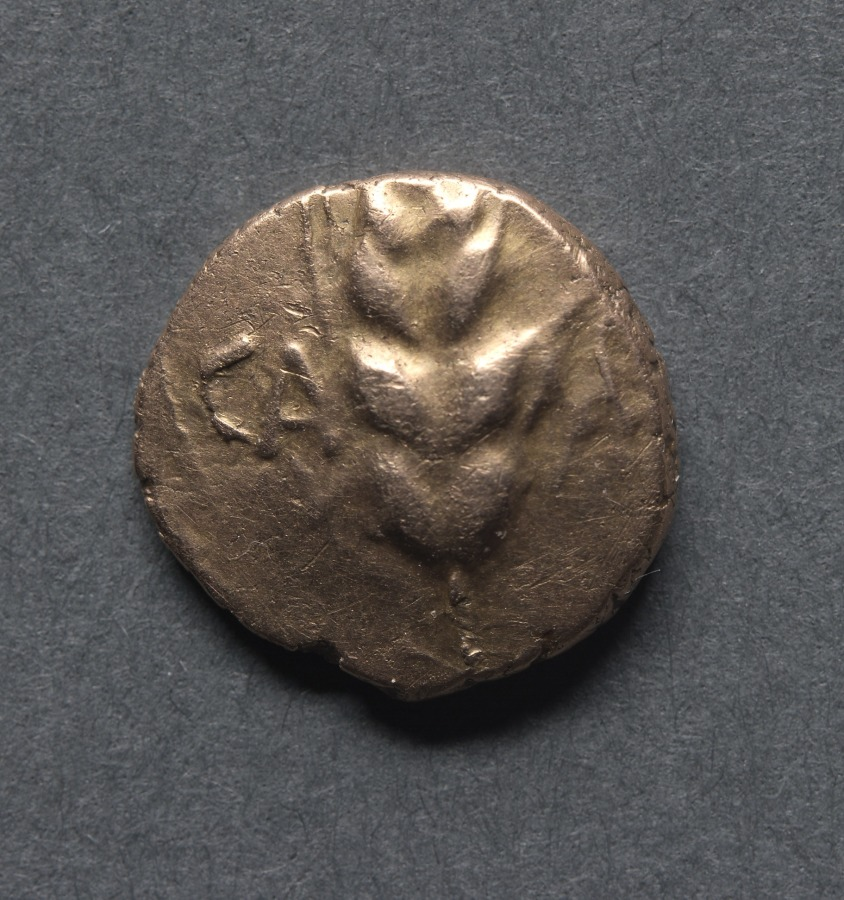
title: Cunobeline Quarter Stater: Corn (obverse); Horse and Branch (reverse)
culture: England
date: c. 10–40 CE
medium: gold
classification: Coins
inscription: CA MV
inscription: CVNO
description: The ear of corn or wheat is frequently found on coins of Cunobeline. The workmanship on the horse is not as good as another in the collection, 1969.152. The relative proportions of the head and neck are poor and the animal has acquired an additional joint in its right foreleg, though this does not appear on all specimens.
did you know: Cunobeline (Strong as a Dog), was a king in pre-Roman Britain from about AD 9 until about AD 40.